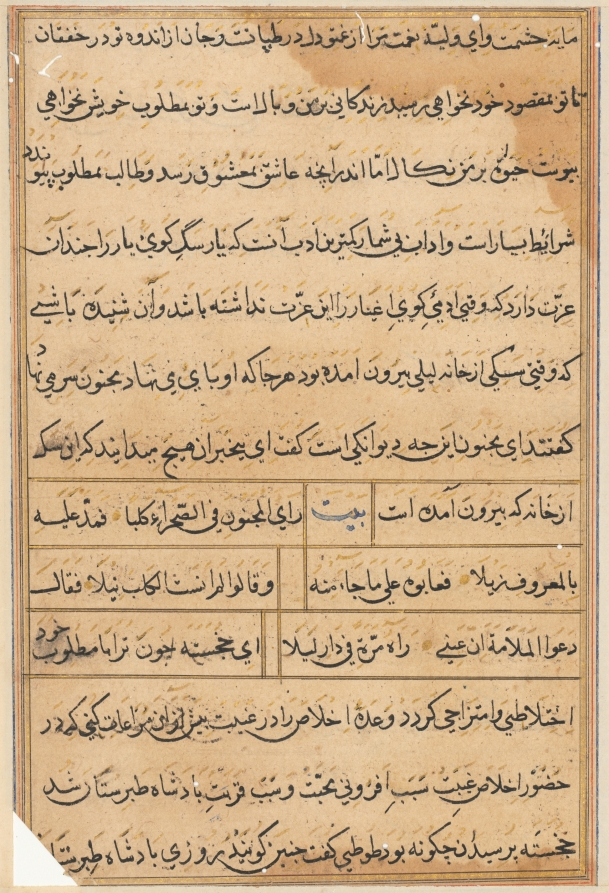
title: Page from Tales of a Parrot (Tuti-nama): text page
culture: Mughal India, court of Akbar (reigned 1556–1605)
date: c. 1560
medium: gum tempera, ink, and gold on paper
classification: Painting